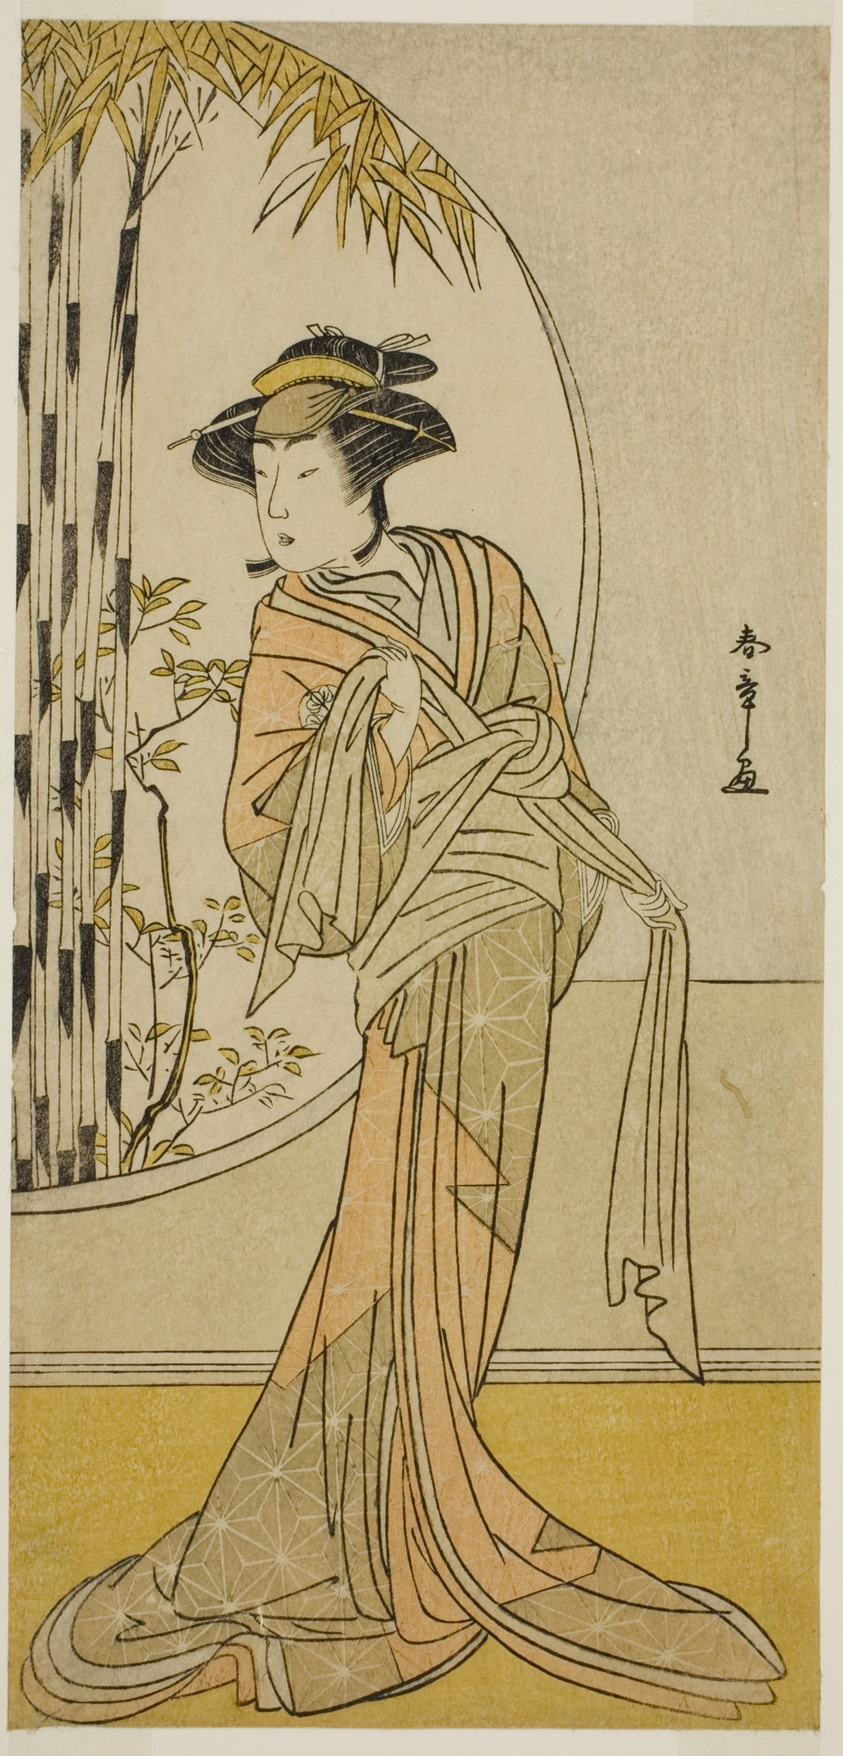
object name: Print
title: The Actor Tsuneyo II as Okaru in the Play Kanadehon Chushingura, Performed at the Morita Theater in the Eighth Month, 1779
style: Japanese (culture or style)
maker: Katsukawa Shunsho 勝川 春章; Japanese, 1726-1792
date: c. 1779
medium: Color woodblock print; hosoban; right sheet of diptych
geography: Japan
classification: woodblock print; print; asian art